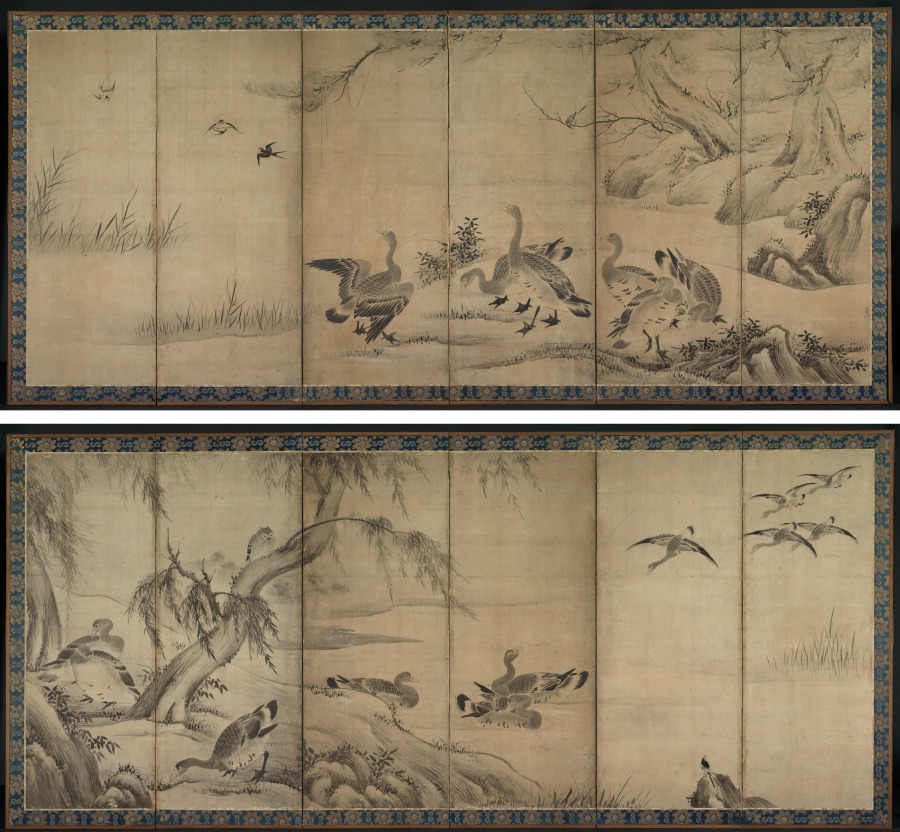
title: Wild Geese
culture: Japan, Edo period (1615–1868)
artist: Kano Sanraku (Japanese, 1559–1635)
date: late 1500s-early 1600s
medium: pair of six-fold screens; ink on paper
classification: Painting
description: Depictions of geese usually appear as ink paintings in Japan during the 1200s. They later show up in the colorful landscapes of illustrated handscrolls. Such early ink renditions of the birds have long been associated with classical Chinese Zen painting and poetry, which was avidly admired and collected in medieval Japan. In these screens the artist portrayed the waterfowl in a pastoral setting without reference to classical or religious themes. Such ordinary subjects were imbued with special meaning in 14th- and 15th-century Japan through associations with continental culture, Zen thought and poetry, and famous Chinese monk-painters whose painting techniques had become revered as visual emblems of Zen principles. The screens here reflect the continuation of that painting tradition in the late 1500s or early 1600s by the head of the most important studio in Kyoto. Sanraku also executed a number of colorful folding screen compositions, but here he pays homage to the style of early Zen painting.